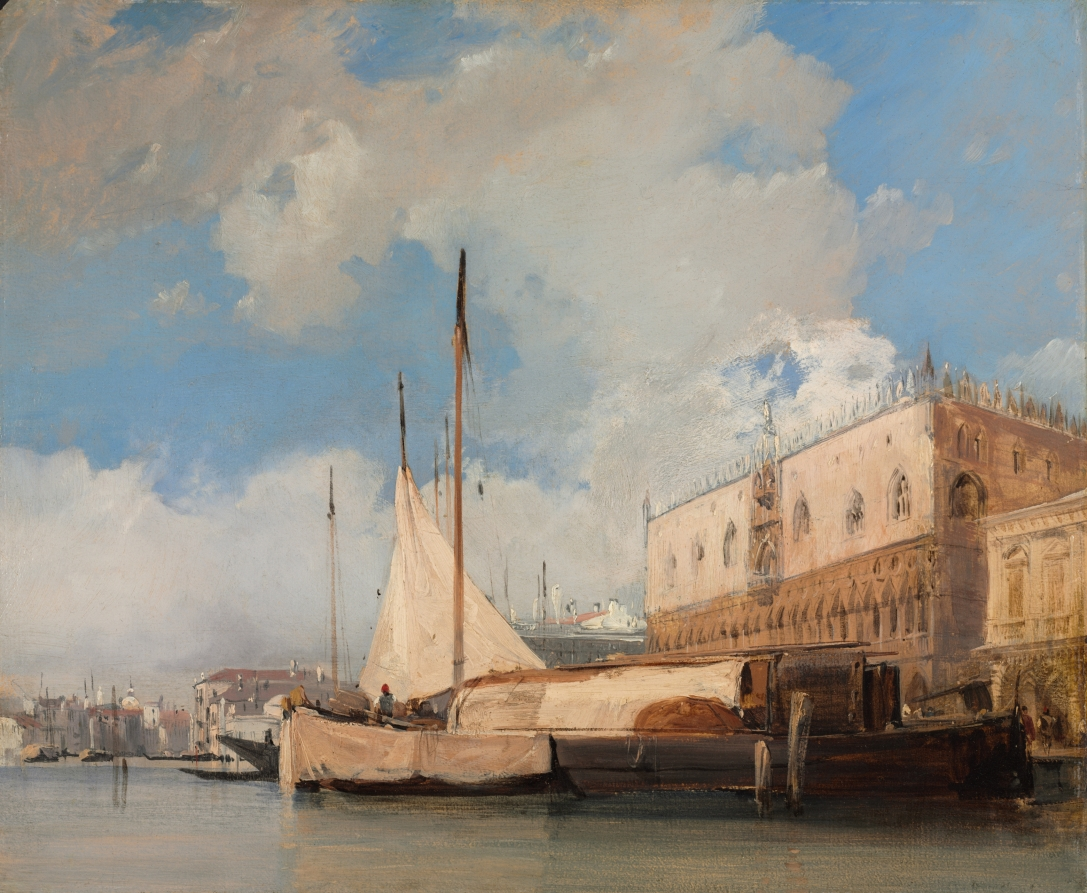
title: The Doge's Palace, Venice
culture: England, 19th century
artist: Richard Parkes Bonington (British, 1802–1828)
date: 1826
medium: oil on millboard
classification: Painting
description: At the age of 22, Bonington achieved overnight success at the official (state sponsored) Paris exhibition known as Salon. Two years later, in 1826, he journeyed to Venice, a city that had long attracted landscape artists. At first, constant rain greatly depressed Bonington, but suddenly the weather changed and Venice was at its glorious best. Bonington frequently painted outdoors, capturing immediate impressions of Venetian architecture and sunlight. He made this particular study from a boat anchored in the lagoon near the Doge's Palace. The thick swirls of paint, with colors mixed together while still wet, indicates how rapidly the artist worked.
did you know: At age seventeen, Bonington began teaching precision drawing at the École des Beaux Arts in Paris and he was essential to bringing aspects of the English style to France.